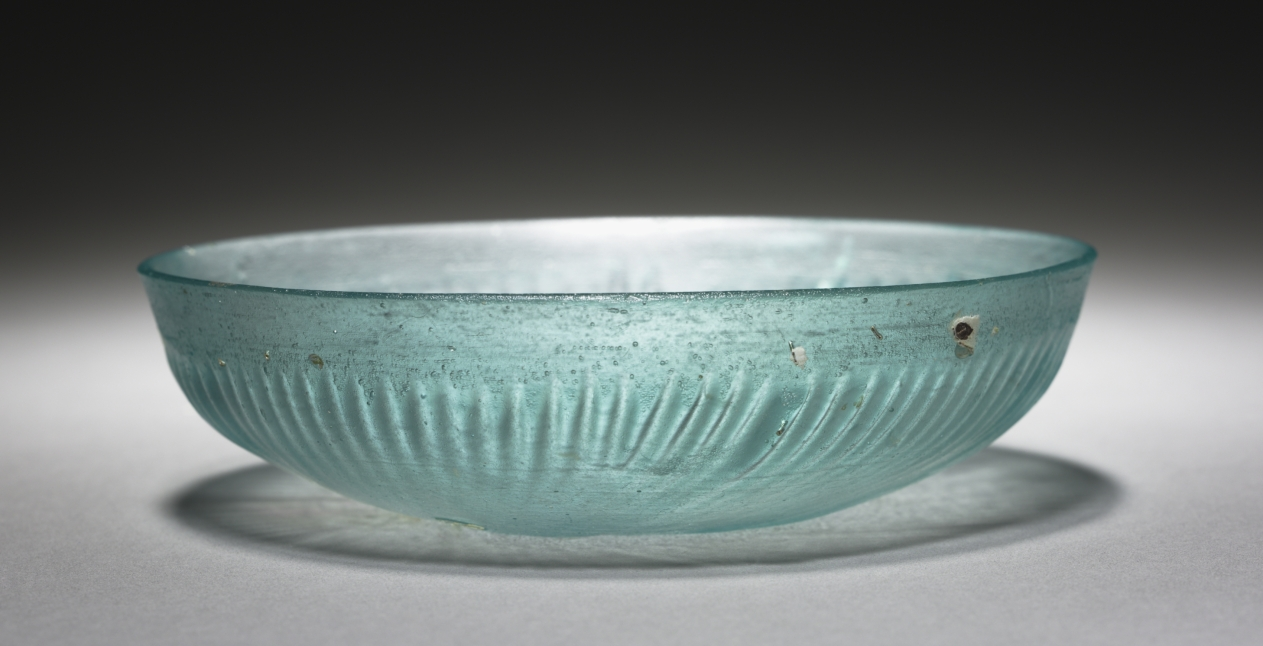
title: Shallow Ribbed Bowl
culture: Roman, Eastern Mediterranean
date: 50 BCE–100 CE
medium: glass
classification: Glass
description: Shallow ribbed glass bowls, often light blue, green, or turquoise in color, are a fairly common ancient glass vessel type. They were likely made by blowing or pressing molten glass into molds, sometimes leaving visible air bubbles within the glass matrix. After cooling, an artisan would rotate the bowl on a wheel or lathe, using a gentle abrasive to smooth out imperfections.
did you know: The Roman shallow ribbed bowl, with central boss, recalls the earlier Greek phiale (libation dish).